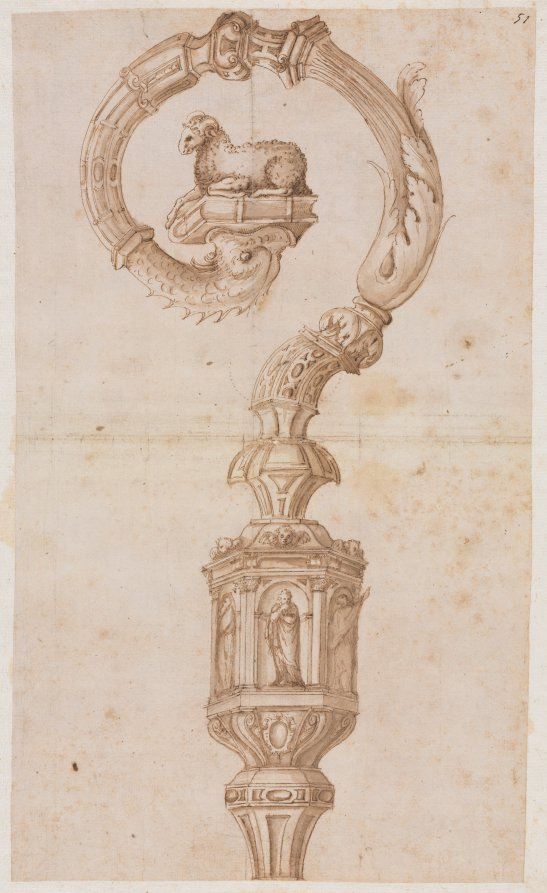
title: Design for a Crozier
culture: Italy, 16th century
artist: Luzio Romano (Italian, active 1528–75)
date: mid 1500s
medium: pen and brown ink and brush and brown wash; pricked (bottom half)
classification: Drawing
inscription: upper right, in brown ink: 51 ; RECTO OF SECONDARY SUPPORT, upper right, in black chalk(?): 79 ; lower right, in graphite: [erased] ; lower right, in graphite: 19 [underlined] ; VERSO OF SECONDARY SUPPORT, lower right, in graphite: A 3106